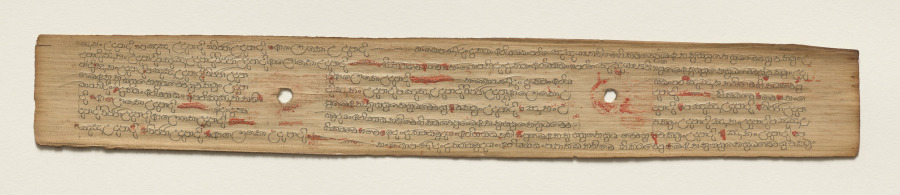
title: Leaf from a Buddhist Manuscript (verso)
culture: Sri Lanka, Singhalese, Late 17th century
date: c. 1700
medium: fiber paper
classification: Manuscript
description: Palm leaf material is still used for manuscripts in Sri Lanka. The palm leaves are prepared first by boiling them, drying them in the sun, and then rubbing them with oils. Scribes then use a metal stylus to incise the text. Then charcoal powder is wiped across the pages, filling in only the inscribed lines.